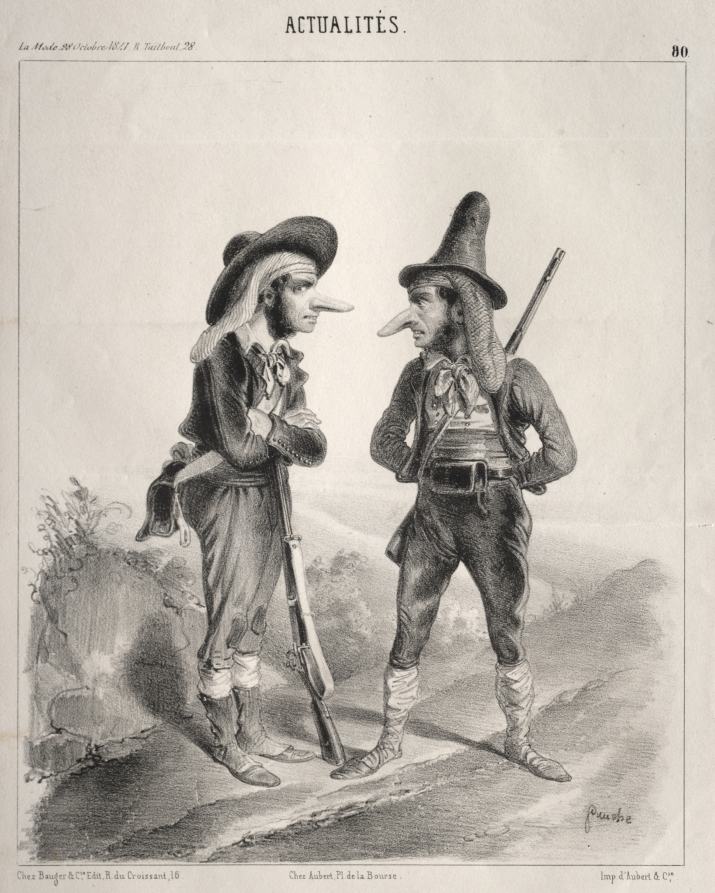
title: Actualités: Insurgez-vous donc! ...hien! voilà qui va devenir gentil! pourvu qu'on ne nous donne par sur les castagnettes!! ... avec notre pied de nez!!!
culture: France, 19th century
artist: Clémente Pruche (French, 1831–1870)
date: 1841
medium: lithograph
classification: Print